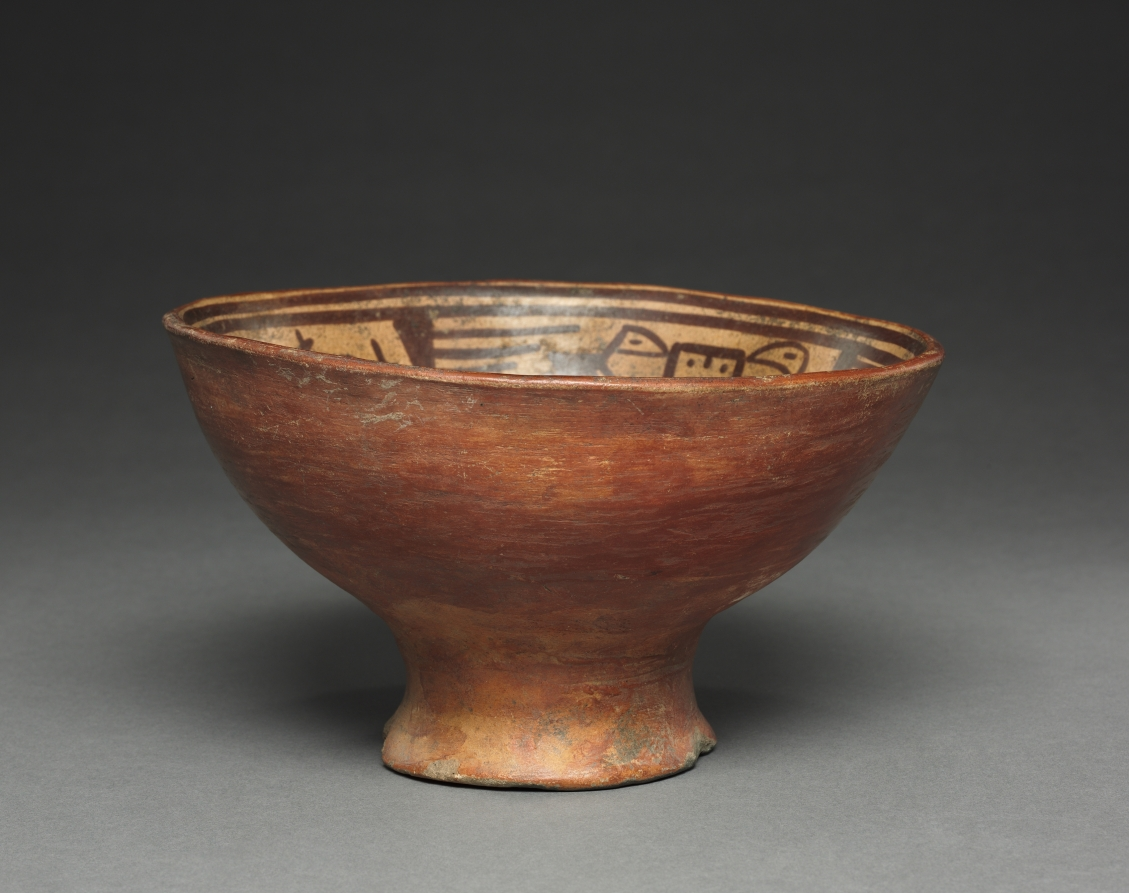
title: Bowl with Humans and Birds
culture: Colombia, Highland Nariño region,Tuza style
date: c. 1250–1550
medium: earthenware with colored slips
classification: Ceramic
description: In the Nariño region of southwestern Colombia, the dead were buried in shaft tombs, the most elaborate up to sixty feet deep and furnished with offerings such as these bowls. Colombian ceramics are not much studied and little can be said about their imagery, which reveals a keen interest in geometric abstraction. Depicted here are a row of figures with thatch-roofed huts, humans attacked by birds, and spiders.